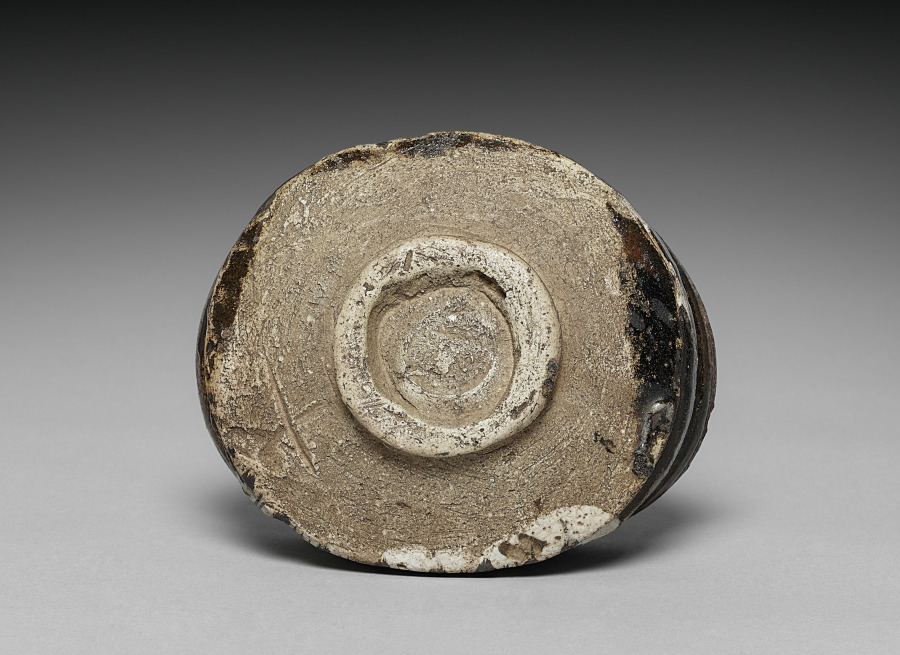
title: Clog-shaped Teabowl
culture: Japan, Momoyama period (1573–1615)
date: early 1600s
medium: Glazed stoneware (Mino ware, Oribe type)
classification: Ceramic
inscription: Mark: cross on base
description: Tea gatherings are fundamental to Japanese culture. Teabowls like this one are the most important objects used in tea practice. Its oblong shape and bold abstract designs are the signature style of the time period in which it was produced. That style is called Oribe, named for the tea master who championed the aesthetic.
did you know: Oribe is a government position. It means the person in charge of textiles.